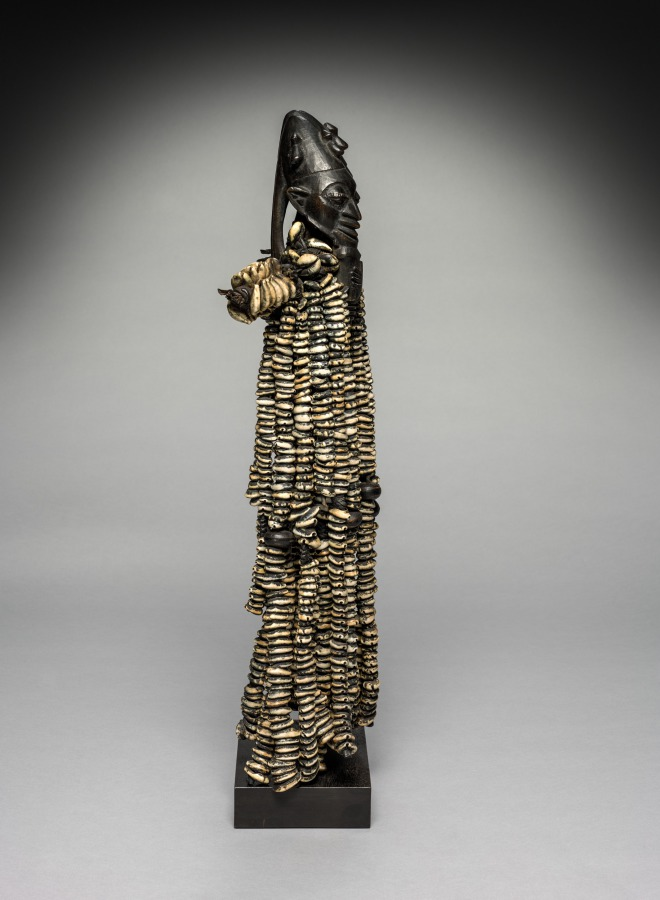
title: Dance staff for Èṣù (Ògò Èlẹ́gba)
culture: Africa, West Africa, Nigeria, Yorùbá-style maker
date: 1800s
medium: Wood, leather, cowrie shells, seeds, and natural fiber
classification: Sculpture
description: Èṣù (also called Èḷégba) embodies the most complex deity in the Yorùbá pantheon of gods. The messenger of the Yorùbá gods, Èṣù is also the bearer of sacrifices, guardian of the ritual way of life, and is associated with highly significant places including crossroads, markets, and home entrances. As seen here, Èṣù's power is often visually represented in Ògò Èḷégba (dance staffs); in this example, the unusually paired man and woman reference his ability to switch between the two genders, turn death into life (through childbirth), and to overcome the tension between the sexes. The male character bears a ritual flute reserved for this god. The abundance of cowrie shells means that Èṣù brings wealth.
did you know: If Eshu isn’t properly honored, trouble may befall the community or individual.